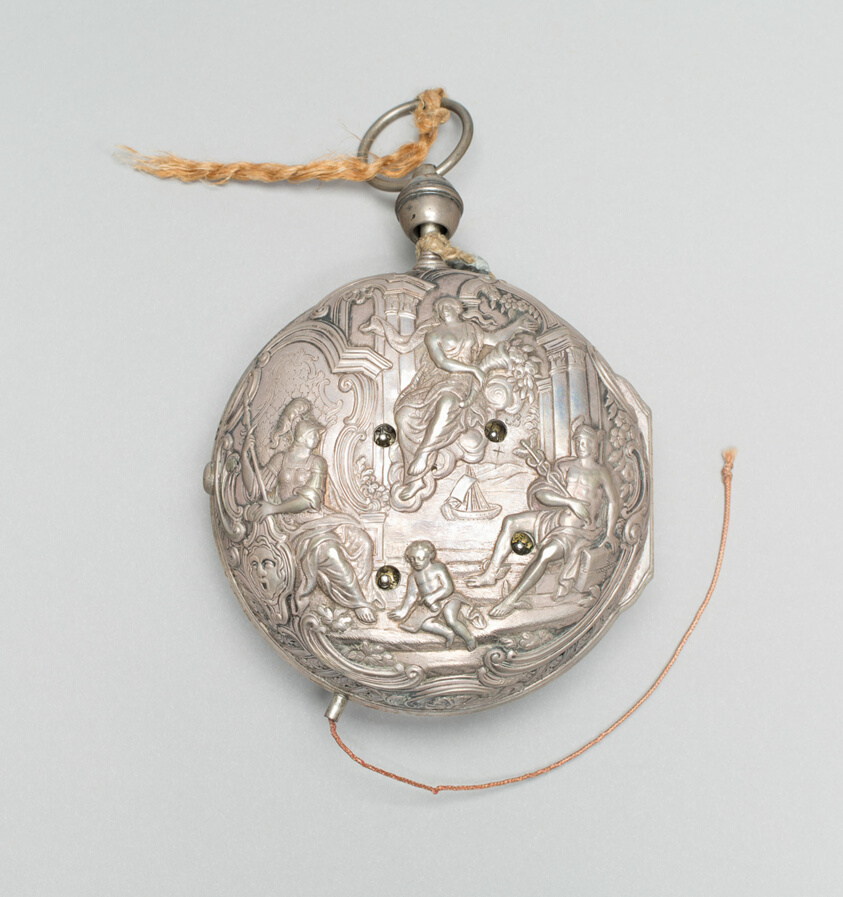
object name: Metalwork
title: Coach Watch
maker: Johann Eusebius Loderer; German, 1770-1776; Augsburg, Germany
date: c. 1770/76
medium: Silver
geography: Augsburg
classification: silver; metal; watch; european decorative arts; metalwork